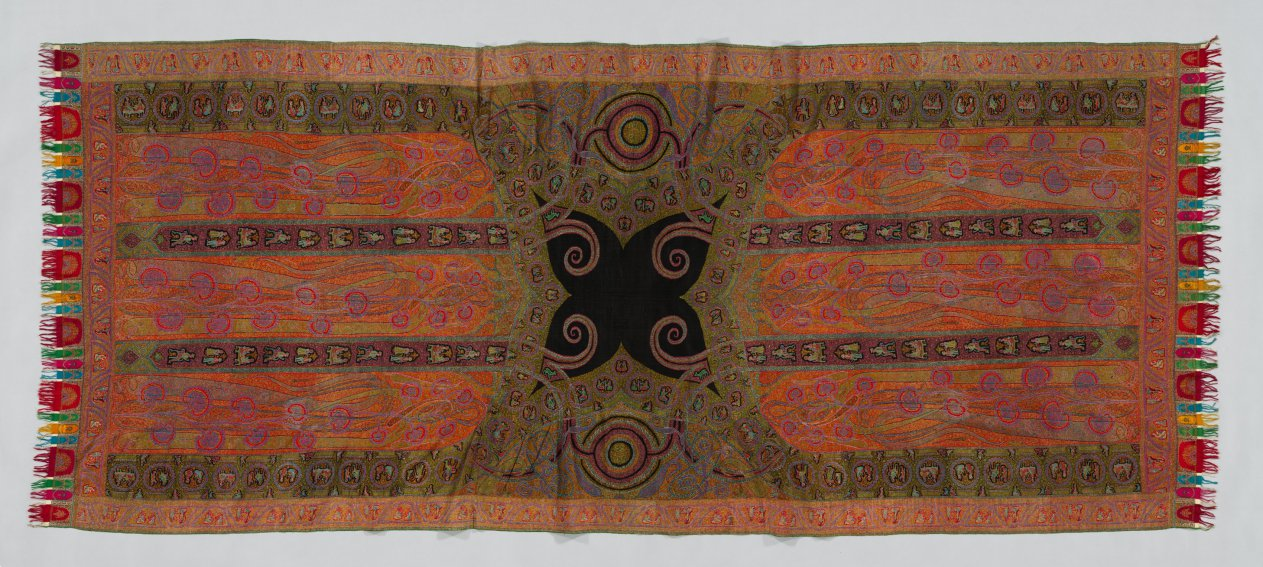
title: Long shawl with woven figures and animals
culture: India, Kashmir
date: c. 1885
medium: 2/2 twill tapestry weave, double interlocked and pieced: wool (possibly pashmina)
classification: Textile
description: Kashmir shawls from India were status symbols in Europe during the 1800s, and few are as rare as this woven example. Over 200 human figures take part in drinking, smoking, dancing, and falconry in the Indian princely scenes that enliven the shawl’s borders and four dark stripes. The stripes alternate with large elongated boteh, or paisley, motifs that intertwine with blossoming stems in a European style adapted by Kashmiri textile artists. This extraordinary woven shawl was probably made to dazzle the jury at one of the European expositions of industrial products, as almost all other figural shawls were embroidered. It was woven in many pieces and then skillfully joined with colorful harlequin end borders.